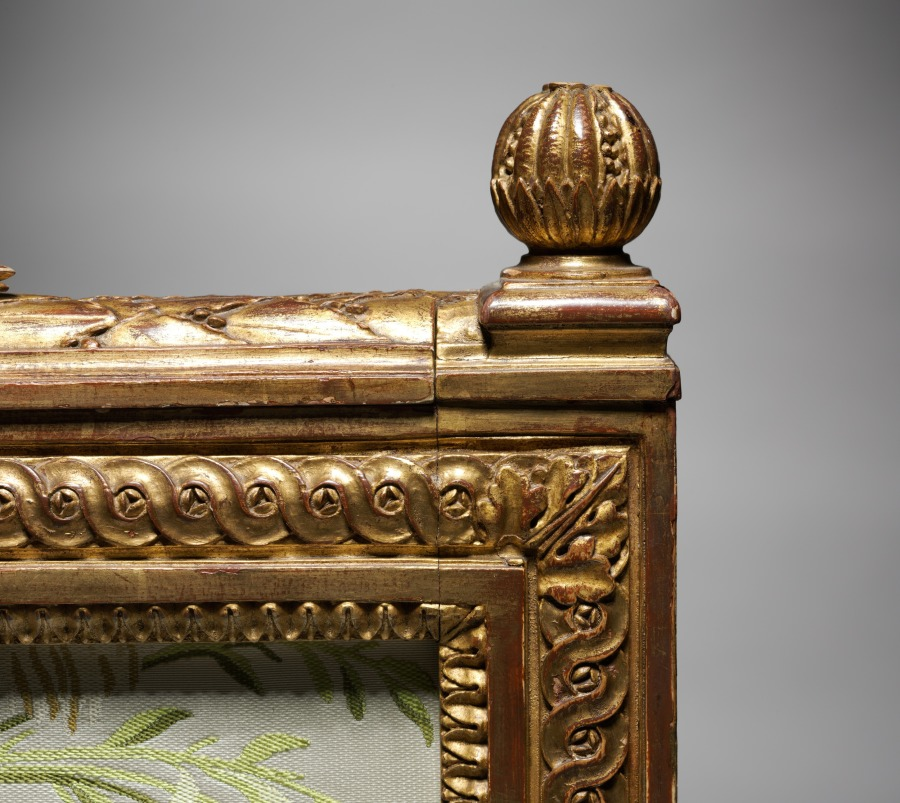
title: Fire Screen (Écran de Cheminée)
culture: France, Paris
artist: Georges Jacob (French, 1739–1814)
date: c. 1780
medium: gilt wood, upholstery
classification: Furniture and woodwork